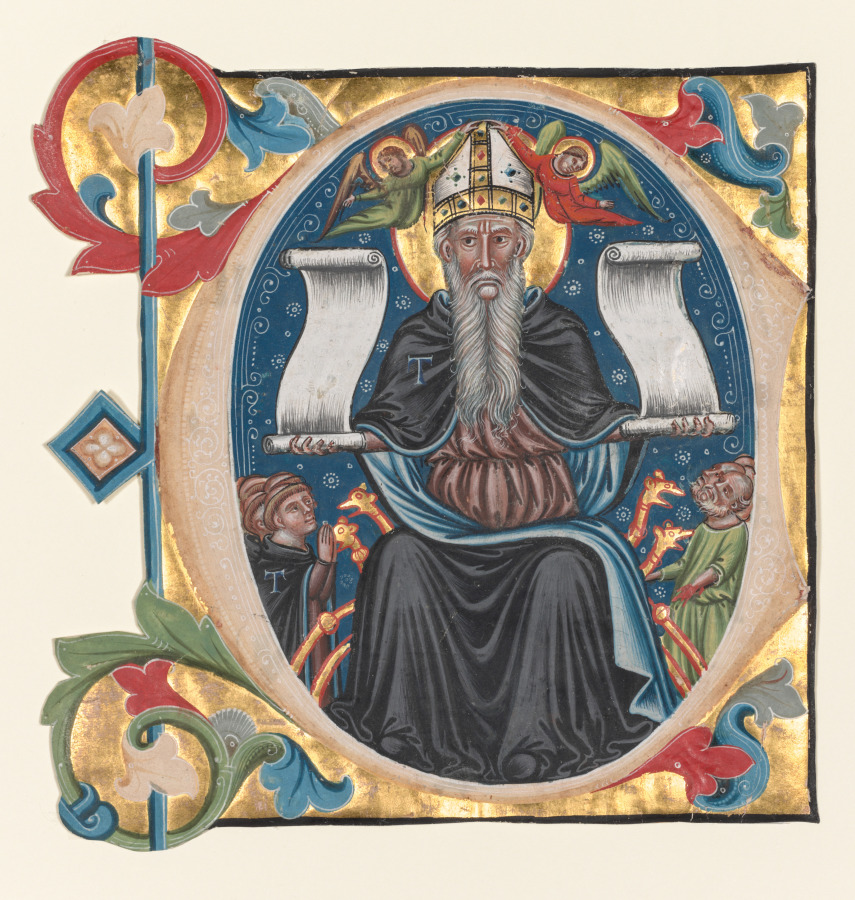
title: Initial C Excised from a Choral Book: St. Anthony with Antonite Friars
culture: Italy, Venice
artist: Giustino di Gherardino da Forlì (Italian, 1325–1425)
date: c. 1360–70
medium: ink, tempera, and gold on vellum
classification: Manuscript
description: The focus of this initial is an imposing portrait of Saint Anthony, one of the original Christian “desert hermits.” Anthony retired into the Egyptian desert where he remained in solitude for many years. He is generally regarded as the founder of monasticism and, along with Saints Jerome, Ambrose, and Gregory the Great, one of the four fathers of the Christian Church. Anthony is identified here by his monastic garb and by the tau (T-shaped Egyptian cross) on the shoulder of his cloak. The religious order bearing his name was founded in the 11th century, and numerous monasteries were founded in his honor. Members of this order are depicted in the lower left.